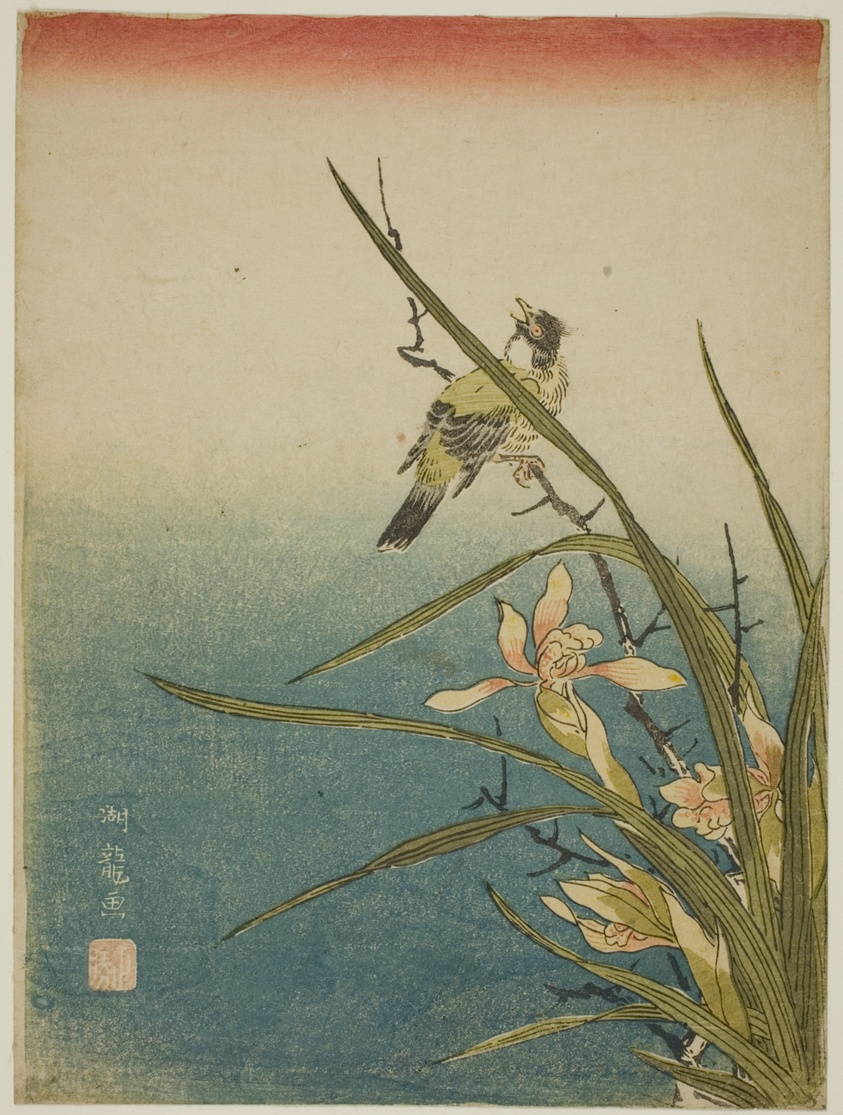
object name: Print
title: Orchid and Bird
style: Japanese (culture or style)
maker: Isoda Koryusai (Japanese, 1735-1790)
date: c. 1770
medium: Color woodblock print; chuban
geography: Japan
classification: woodblock print; print; asian art